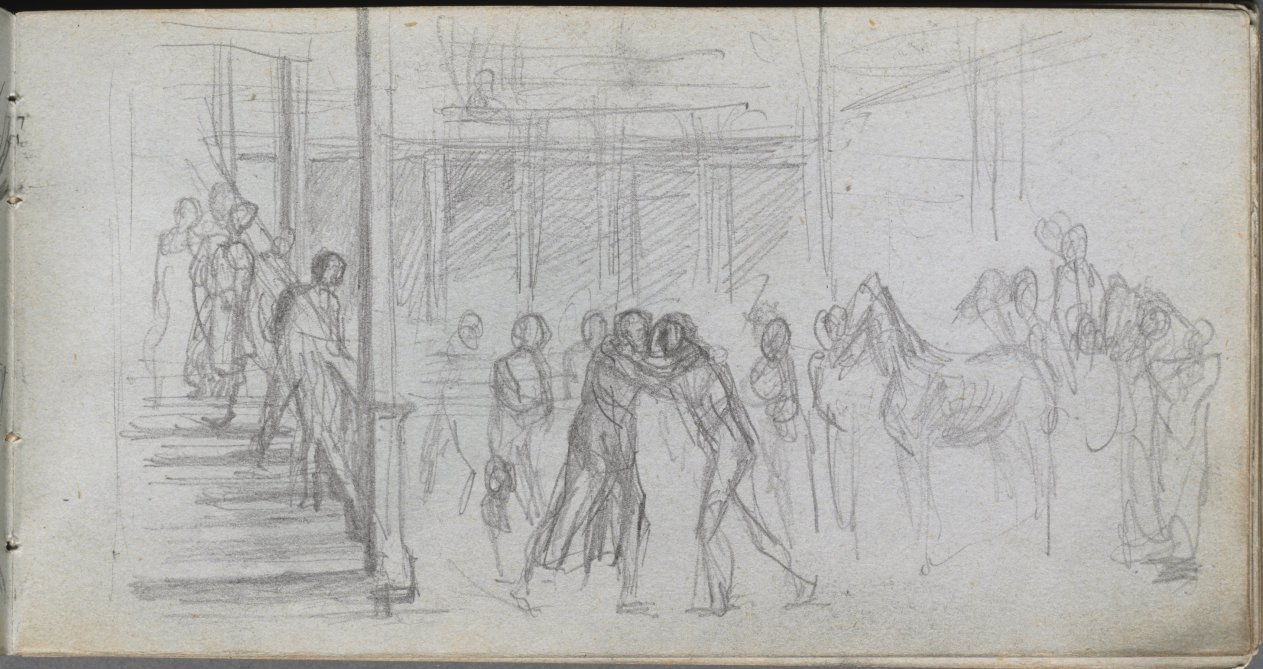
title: Sketchbook, page 62: Figure Study, Stairway, Horse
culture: France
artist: Ernest Meissonier (French, 1815–1891)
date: c. 1860s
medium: graphite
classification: Bound Volume